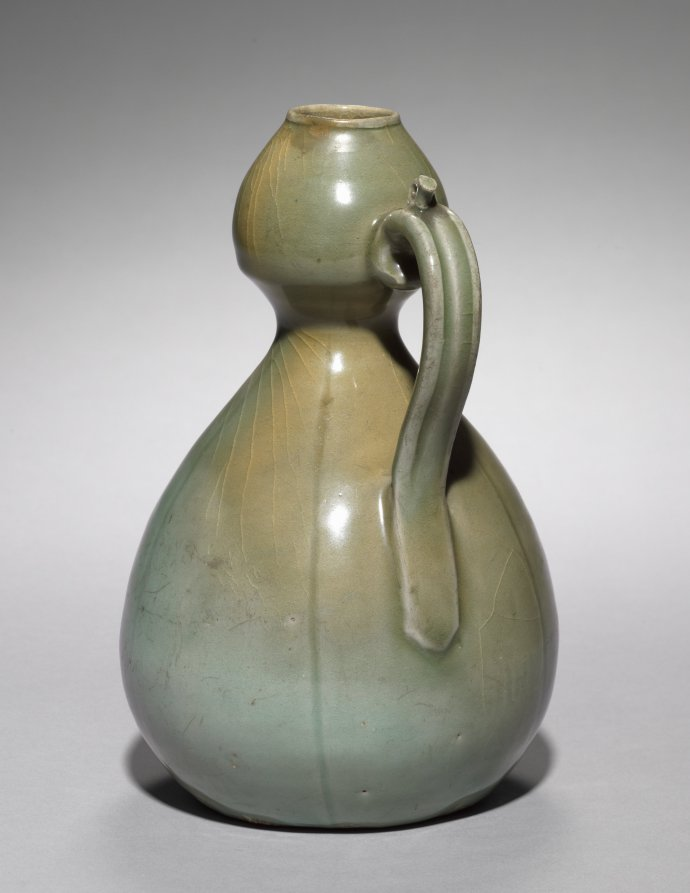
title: Gourd-shaped Wine Pot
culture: Korea, Goryeo dynasty (918–1392)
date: 1200s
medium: pottery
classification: Ceramic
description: As early as the seventh century, the practice of drinking tea and wine became an important part of elite culture in Korea. Elites of the Goryeo period commissioned a variety of types of utensils and vessels including this elegant wine pitcher, not only to make their drinking experience more exciting, but also to show their appreciation of nature.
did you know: This gourd-shaped bottle once used to serve wine.